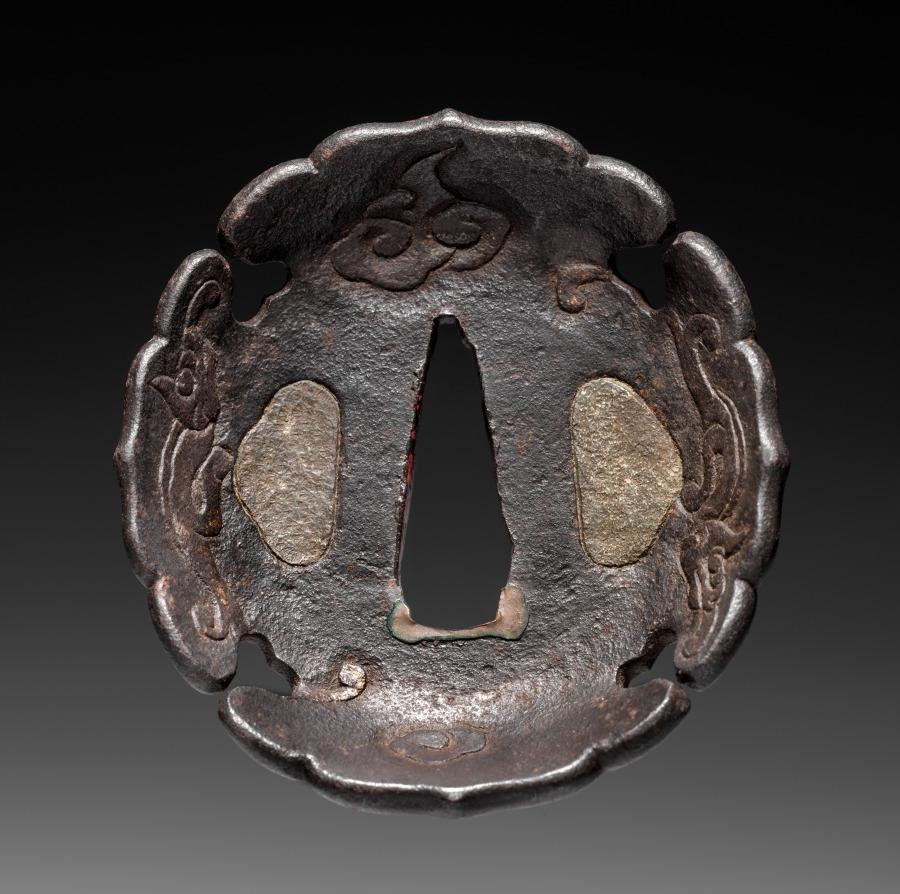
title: Sword Guard (Tsuba) with Lions in Peonies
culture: Japan, possibly Edo period (1615-1868)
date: c. 1615–1868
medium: iron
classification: Arms and Armor